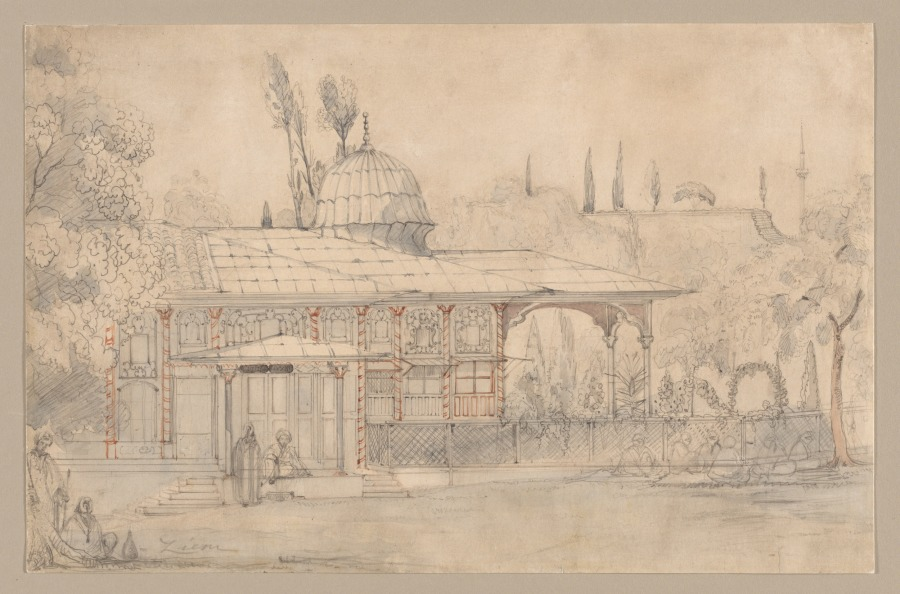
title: Pavilion Near a Mosque (recto) Sketch for Pavilion Near a Mosque (verso)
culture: France, 19th century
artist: Félix Ziem (French, 1821–1911)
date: 1800s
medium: graphite and gray, blue, orange and red wash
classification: Drawing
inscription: signed, lower left, in graphite: Ziem